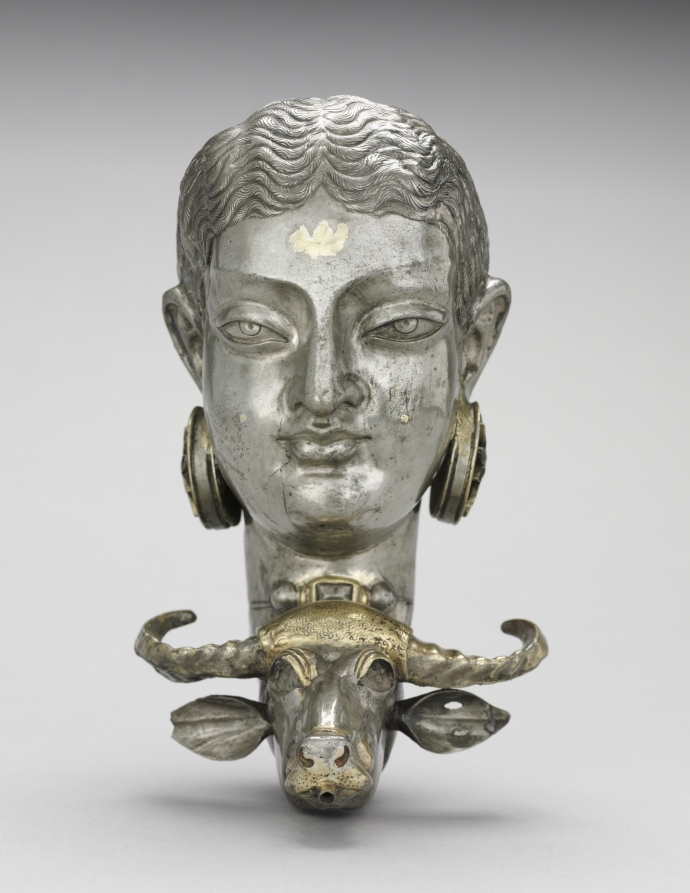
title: Woman and Water Buffalo Rhyton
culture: Sasanian, Iran, 600s or Turk Shahi dynasty, Kabul, Afghanistan, 500s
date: 500–700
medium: silver, with mercury gilding and glass inlays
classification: Metalwork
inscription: ?? 50 ZWZN 3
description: Recalling both Greek and Iranian traditions of head vases and rhyta (drinking horns), this unusual silver vessel combines the heads of a woman and a water buffalo. A filling hole on top and a pouring or drinking spout in front make clear its function. An inscription in Middle Persian on its back records its weight: probably 50 staters and three drachmae (close to its current weight of just over 700 grams, or about 1-1/2 pounds). The woman’s flat brow, straight nose, and widely set, heavy-lidded eyes—along with the sectarian mark in gold on her forehead—relate to art of the Indus River Valley and Hindu Kush regions of today’s Pakistan and Afghanistan. While we do not know for sure, numerous scholars have suggested that she may depict the Indian warrior goddess Durga, slayer of the buffalo demon.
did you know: Inlays once filled the buffalo eye sockets, perhaps of colored glass like that still present within some petals of the disc-shaped earrings.